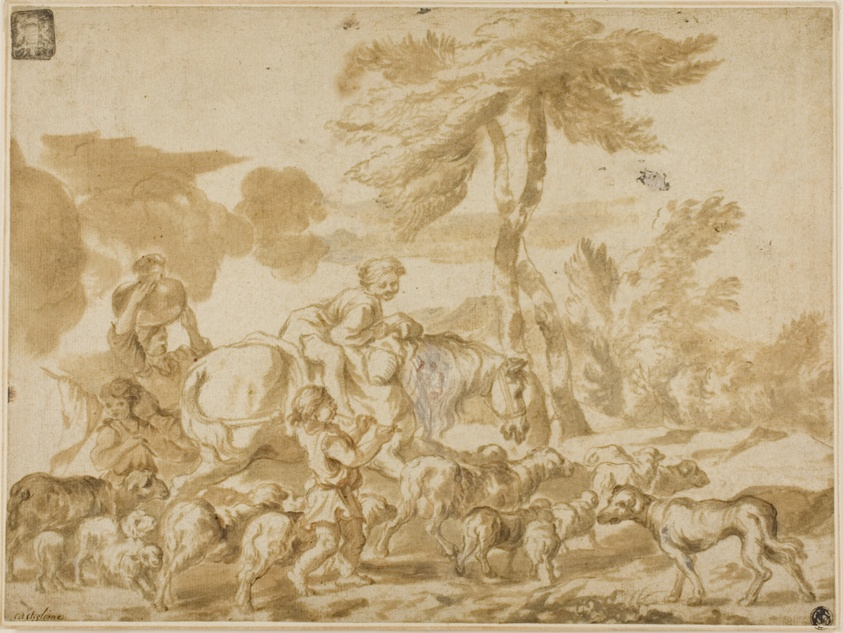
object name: Drawing and Watercolor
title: Peasant Family with Sheep and Dog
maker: Unknown Italian artist; after Giovanni Benedetto Castiglione (Italian, 1609-1664)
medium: Pen and brush and brown ink, with touches of white gouache and red wash, over black chalk, on ivory laid paper, laid down on ivory laid paper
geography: Italy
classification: ink or chalk wash; drawings (visual works); prints and drawing